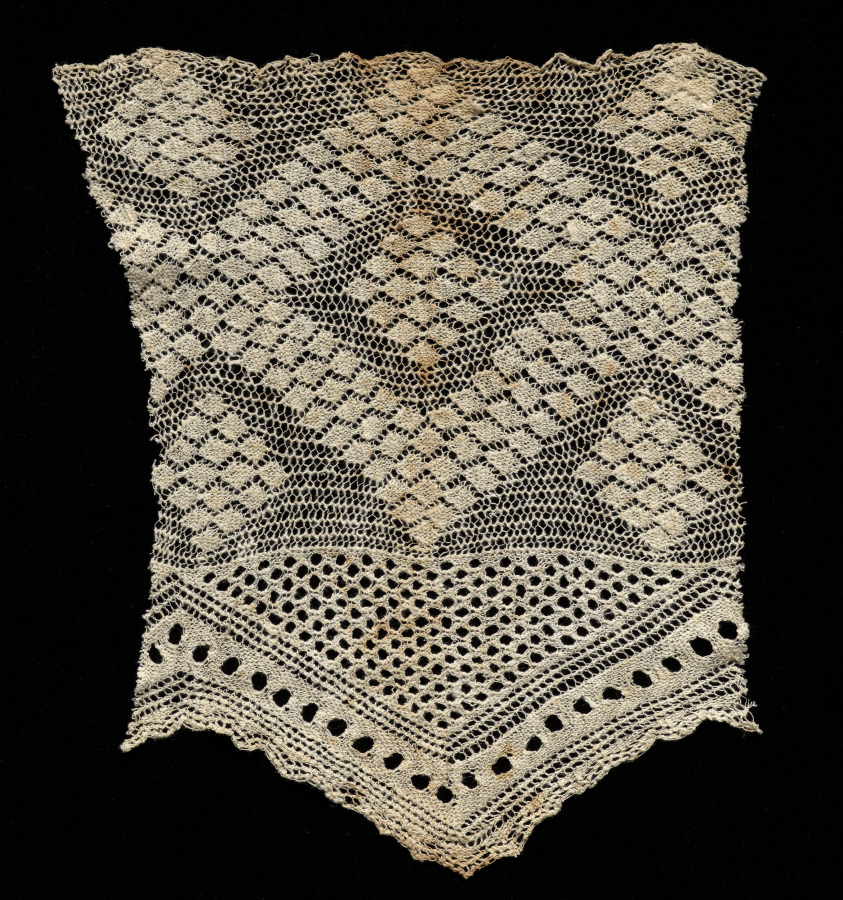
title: Fragment of Lace Flounce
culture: Spain, Seville or Huelva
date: 1700s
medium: Linen and cotton: knit lace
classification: Lace